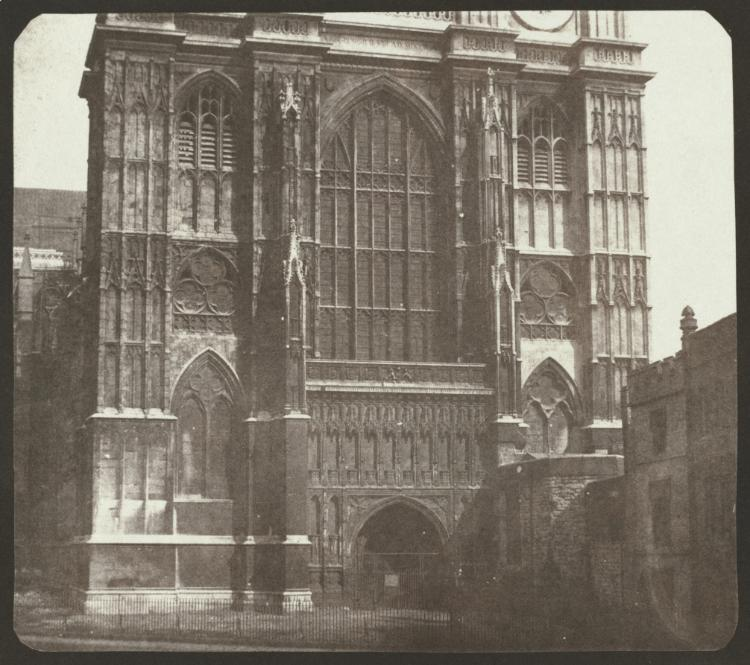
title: Westminster Abbey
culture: England, 19th century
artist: Nicholas Henneman (British, 1813–1898)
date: before 1844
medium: salted paper print from calotype negative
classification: Photograph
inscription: Written in ink on verso "LA22"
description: This rare image is the first photography by Henneman to enter the museum's collection. Its composition stresses the overall form as well as the details of the main entrance of London's Westminster Abbey. Instead of showing the entire building, Henneman selected a close vantage point to express his admiration of one of the greatest examples of early English architecture. Enlivened with strong light and shadow patterns, the sculptural and textural refinements of the building are clearly visible in this subtly toned photograph. Henneman became a key figure in the early history of photography through his association with the inventor of the calotype process, William Henry Fox Talbot (1800–1877). Beginning about 1841, Henneman made some of photography's earliest images and was the master printer for Talbot and a number of his close associates. Talbot even chose this picture to be included with 23 of his own images in his first photographically illustrated book, The Pencil of Nature (1844 to 1846).